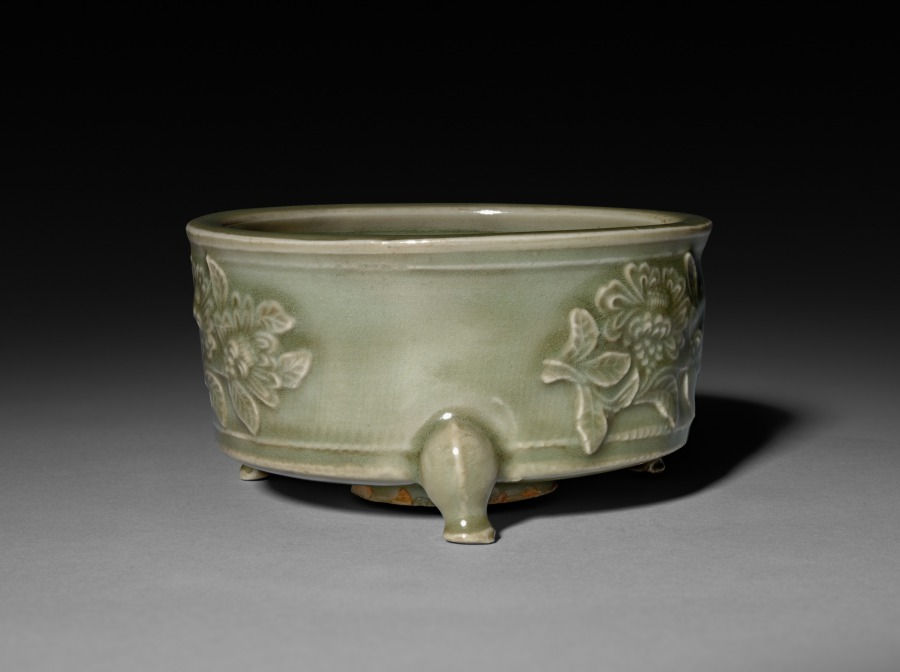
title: Incense Burner in Form of Archaic Lian with Peonies in Relief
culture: China, Zhejiang province, Yuan dynasty (1271-1368)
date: 1300s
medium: Glazed porcelain with molded decoration, Longquan ware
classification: Ceramic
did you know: In East Asian art, peonies traditionally symbolize prosperity and wealth.